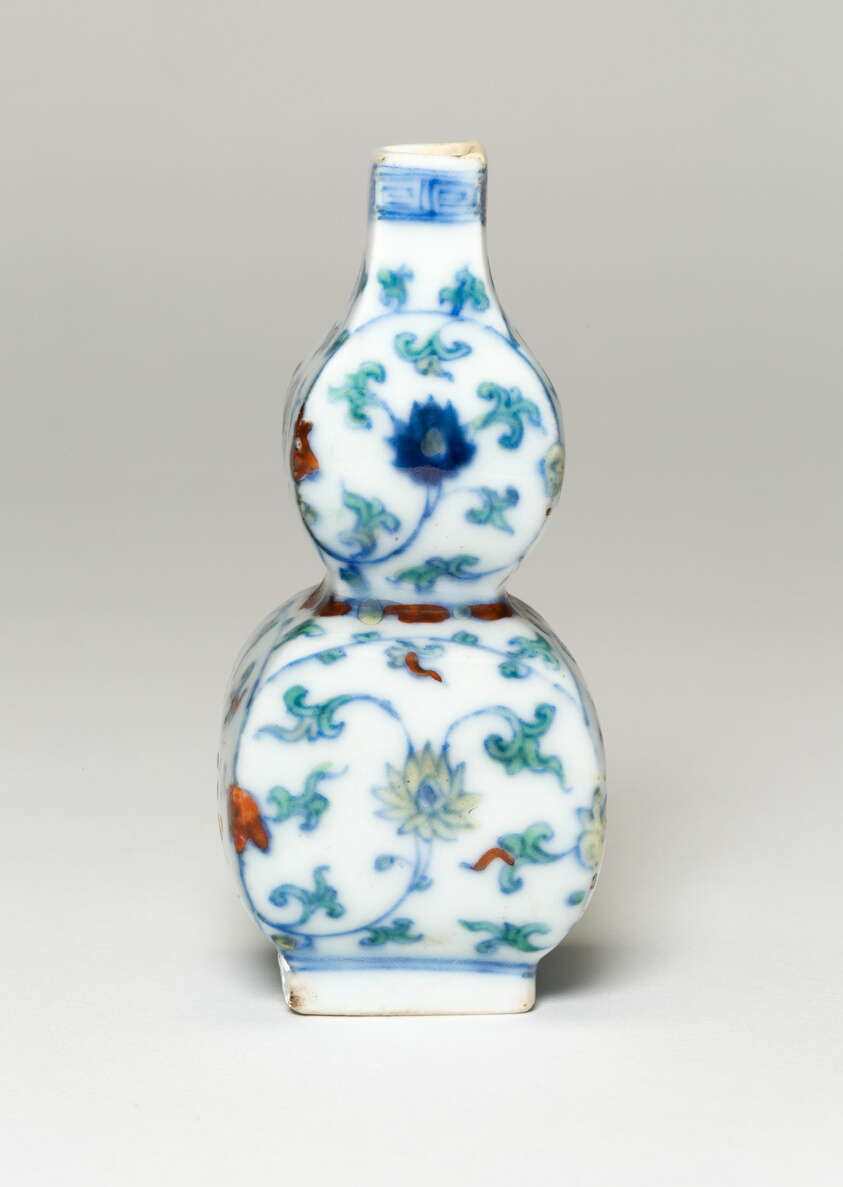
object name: Vessel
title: Double Gourd Vase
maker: China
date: Ming dynasty (1368–1644), Jiajing reign mark and period (1522–1566)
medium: Porcelain painted in underglaze blue and polychrome enamels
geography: China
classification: porcelain; asian art; ceramics; vessel